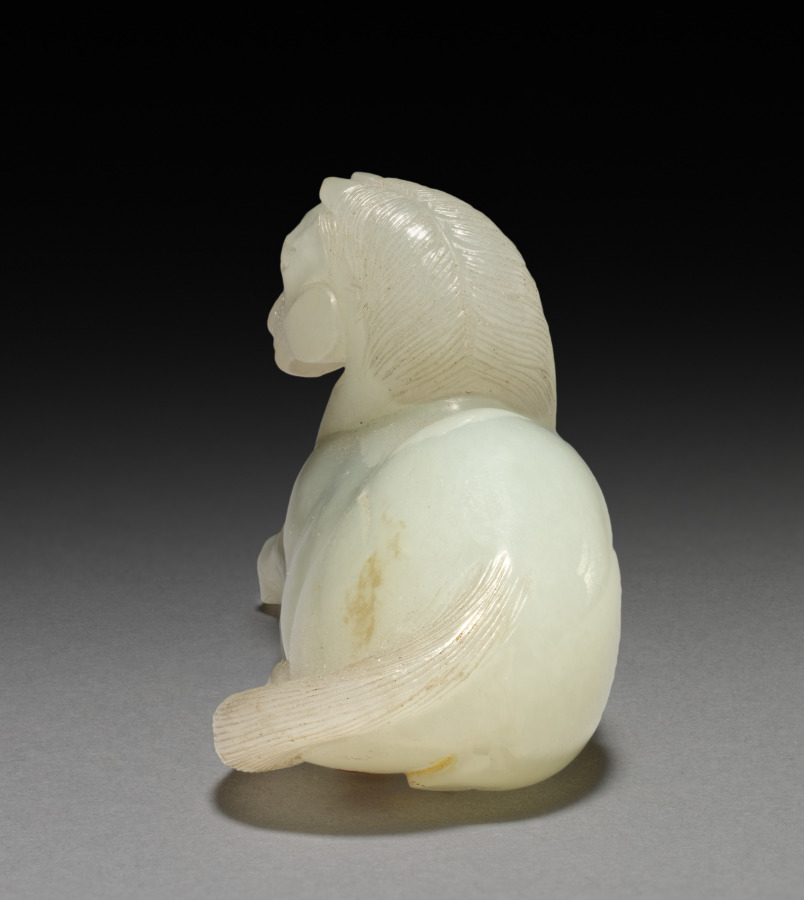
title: Horse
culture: China, Qing dynasty (1644-1911)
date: 1600s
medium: jade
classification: Jade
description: In China, access to political power was granted to those who passed the civil service examinations, a system that offered official service only at a high level of education. Chinese literati-officials whose daily routine was administrative work in an office, enjoyed precious objects on their writing desks that offered distraction and demonstrated good taste. By the Ming (1368–1644) and Qing (1644–1911) dynasties, these utensils of the literati studio became also collectibles and were treasured as artworks. Desk objects included paper weights; seals and seal paste boxes; brush rests, wrist rests and brush holders; water droppers, ink cakes, miniature mountains, and albums, all ranging in material from jade, gilt bronze, lacquer, and wood to porcelain.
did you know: The white jade surface of the horse has been brightly polished, but portions of the original stone's "skin" remain on the base and below the head.